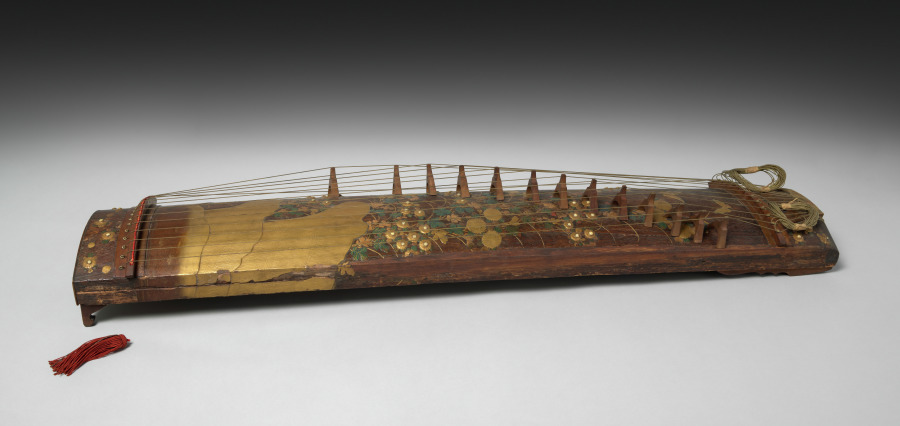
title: Koto (Zither)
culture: Japan, Edo period (1615–1868)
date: early to mid-1800s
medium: Wood with colored lacquer, sprinkled gold powder (maki-e), textile, and silk strings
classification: Musical Instrument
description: This koto has an elaborately decorated surface, suggesting that it was meant to be admired as a decorative object rather than played as a musical instrument. The vertical design shows a profusion of chrysanthemum flowers and miscanthus grass above a brushwood fence as well as a pair of butterflies.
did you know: The koto descended from the guzheng, a Chinese zither first imported to Japan in the seventh century.